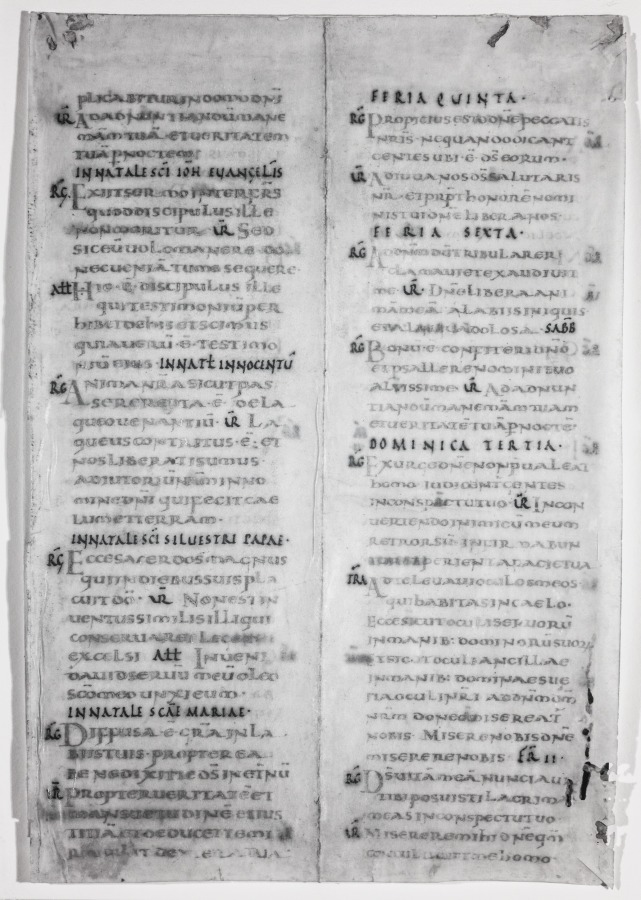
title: Bifolium Excised from a Carolingian Gradual (recto)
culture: Germany or Northeastern France, 9th century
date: c. 830–60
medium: gold and silver ink on purple parchment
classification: Manuscript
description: This rare leaf comes from a cantatorium or gradual, a book containing the chants to be sung during the Mass. Other leaves from the same book survive in Berlin and Trier. A bifolium, or double-leaf, does not contain decorated letters but rather "emphasized" letters. These were enlarged and pushed out into the margins to call attention to the eye. Such emphasized letters originated in late classical times and were the precursor to the decorated initial developed by medieval scribes. The purple-stained vellum (now faded to a deep pink) with its text written in gold and silver inks (now turned black) suggested great luxury with its sumptuous appearance. In Mediterranean regions, the purple dye was obtained from murex, a shellfish dye. In northern Europe, plant dyes were used as an alternative. Combined with the use of gold and silver ink a spectacular appearance was achieved that is traceable back to classical antiquity.